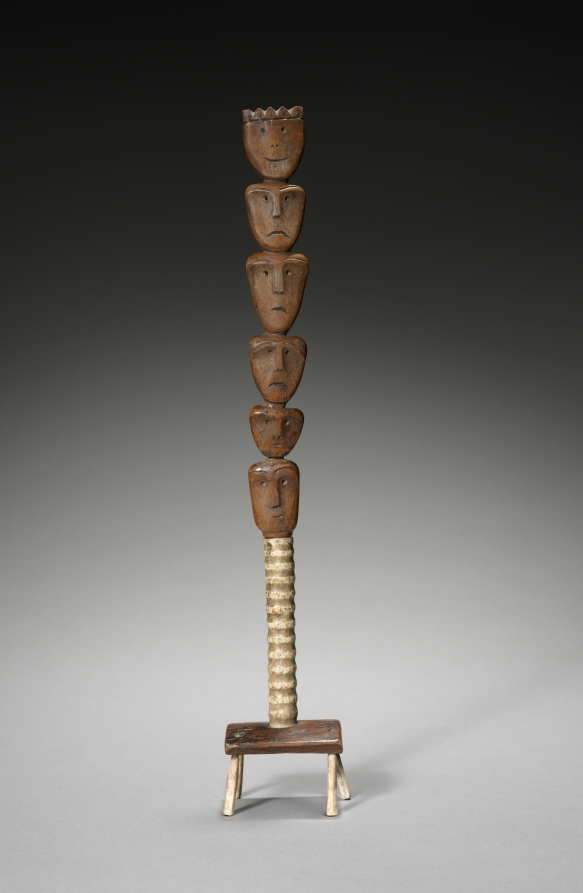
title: Totem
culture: America, North American Indian, Alaska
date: 20th century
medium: wood and bone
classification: Furniture and woodwork